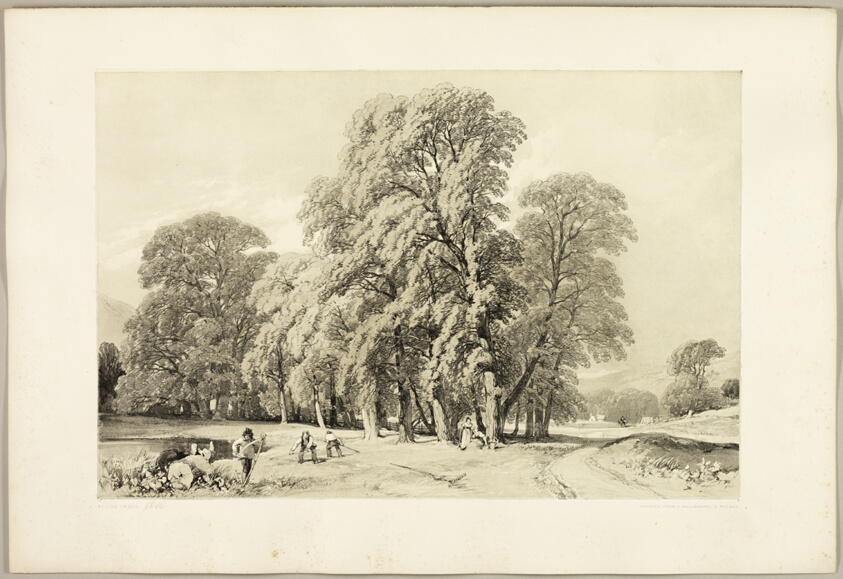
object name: Print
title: Plane Trees, from The Park and the Forest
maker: James Duffield Harding (English, 1798-1863); printed by Charles Joseph Hullmandel (English, 1789–1850); published by Thomas McLean (English, 1788–1875)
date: 1841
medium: Lithograph in black, with gray tint from a second plate, on ivory wove paper, laid down on ivory wove paper (chine collé)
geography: England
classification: lithograph; print; prints and drawing